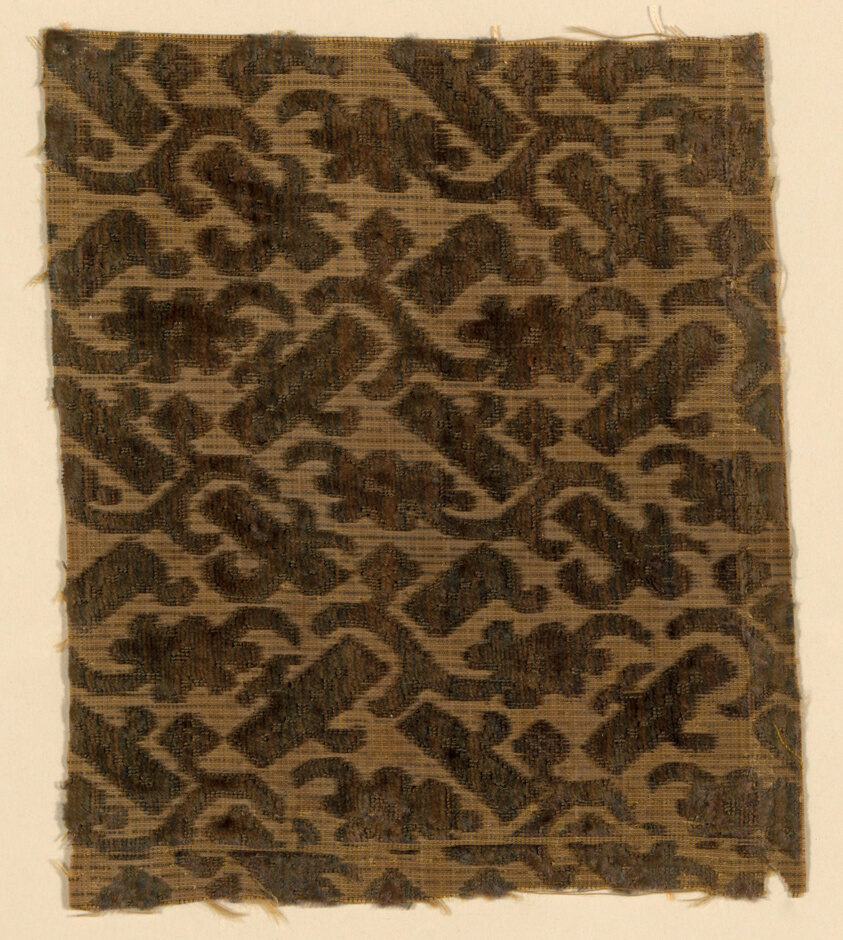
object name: Textile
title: Fragment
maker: Italy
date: 1601/35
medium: Silk, plain weave with gilt-metal strips supplementary facing wefts and supplementary pile warps forming cut and uncut voided velvet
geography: Italy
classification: textile; weaving - velvet